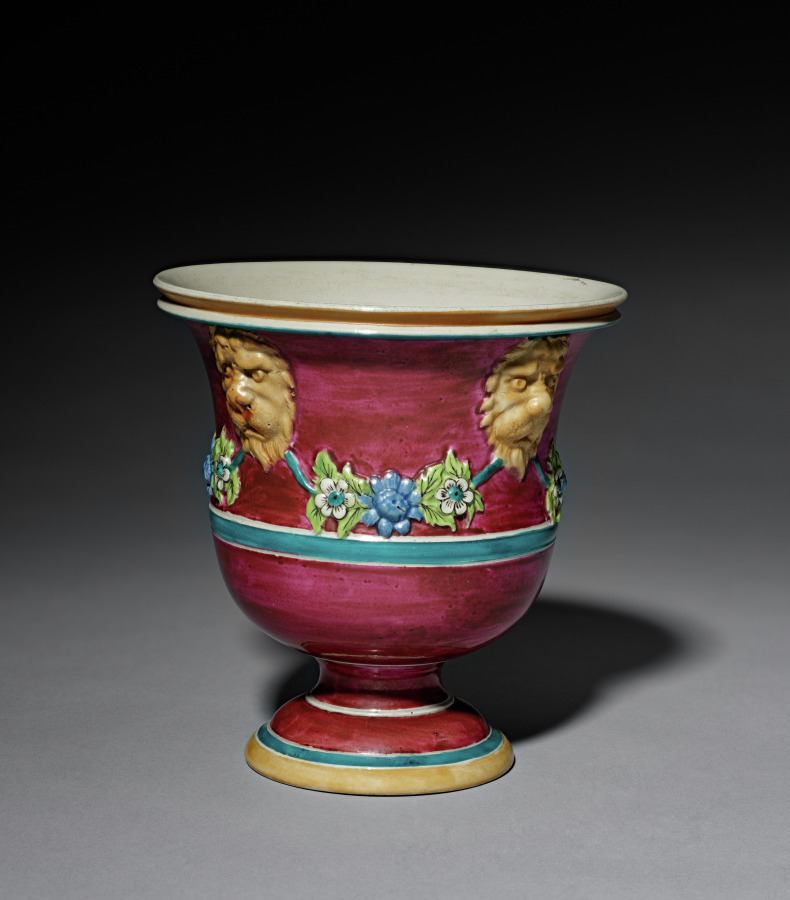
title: Jardinière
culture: England, Staffordshire, 18th century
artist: Staffordshire Factory (British)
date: c. 1760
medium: salt-glaze earthenware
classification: Ceramic